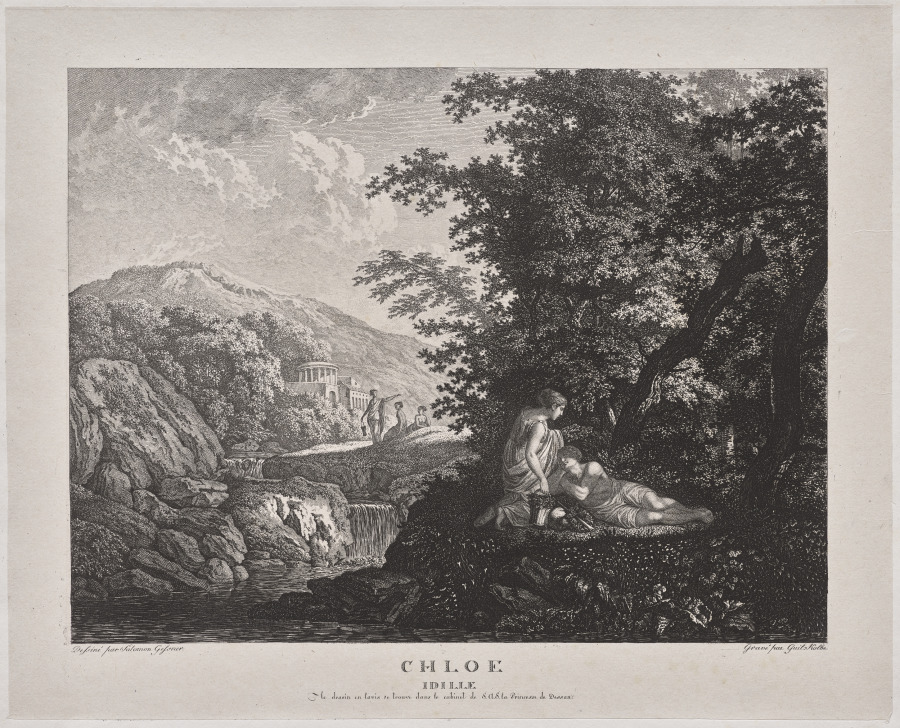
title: Chloe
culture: Germany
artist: Carl Wilhelm I Kolbe (German, 1757–1835)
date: 1805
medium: etching on chine appliqué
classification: Print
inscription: Imprinted on recto: "CHLOE"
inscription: Imprinted on recto: "IDILLE"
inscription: Imprinted on recto: "Le Dessin en lavis de trouvé dans le cabinet de S.Cl.S. la Princesse de Dessan"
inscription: Imprinted on recto: "Desiné par Salomon Gessner/Gravé par Guil Kolbe"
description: In this etching, Chloe, an alternate name for Demeter, Greek goddess of agriculture and fertility, reclines in a lush landscape complete with various figures, voluminous trees, a Greek temple, and a dramatic rockface. Less a narrative than a pastoral idyll, the scene evokes Romantic ideals circulating in Germany at the time that cast the relationship between humans and nature as one of direct, sometimes spiritual, experience. Carl Wilhelm Kolbe’s expert etching technique allows for both sweeping views and minute detail in one composition.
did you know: This work was printed on a chine collé (or appliqué), a sheet of translucent paper that has a slight sheen, affording a precious quality to the print.